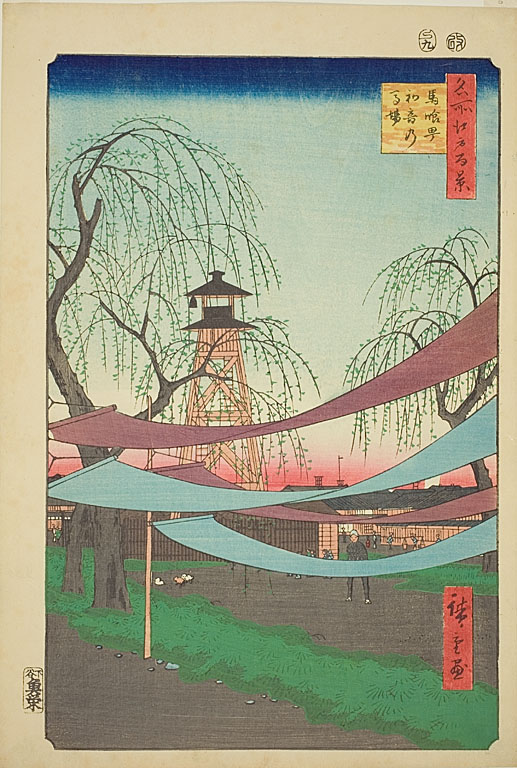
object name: Print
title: The Hatsune Riding Grounds at Bakuro-cho (Bakuro-cho Hatsune no Baba), No.6 from the series "One Hundred Famous Views of Edo (Meisho Edo hyakkei)"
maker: Utagawa Hiroshige (Japanese, 1797-1858)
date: 1857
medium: Color woodblock print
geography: Japan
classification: woodblock print; print; asian art